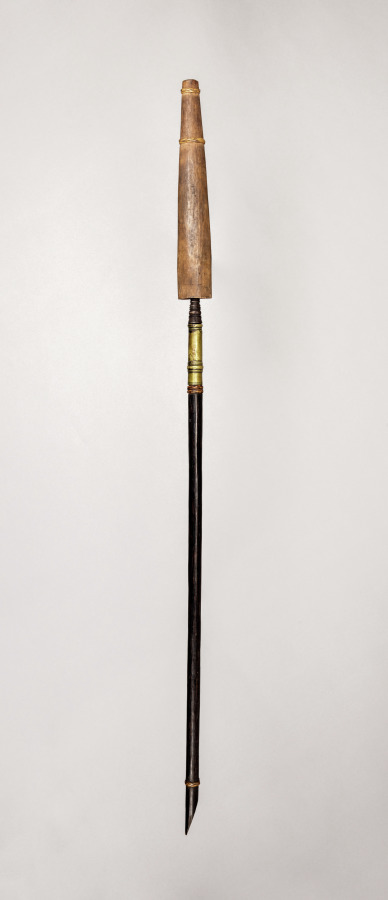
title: Spear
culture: Philippines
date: before 1922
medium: Point: metal and brass ferrule; handle: wood; sheath: wood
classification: Arms and Armor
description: This spear features a wavy, leaf-shaped iron blade with softly rounded undulations along its entire length. The long, darkened wooden shaft is slender and terminates in an iron butt spike reinforced with a small brass ring. The proportions and materials indicate a weapon that functioned not only for combat but also as a high-status object.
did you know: This piece aligns with the weapon traditions of the Maranao, Maguindanao, and Tausug peoples.